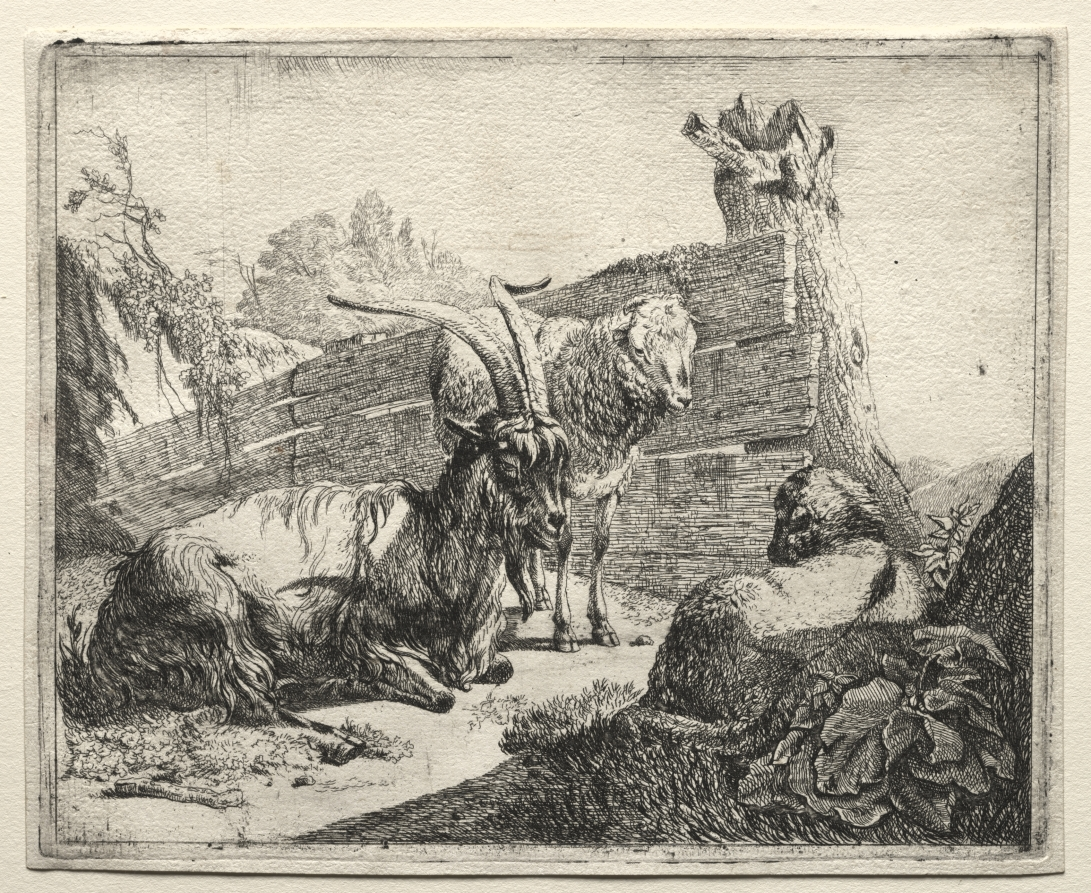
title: The Hedgerow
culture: Germany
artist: Johann Heinrich Roos (German, 1631–1685)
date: 1665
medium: etching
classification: Print